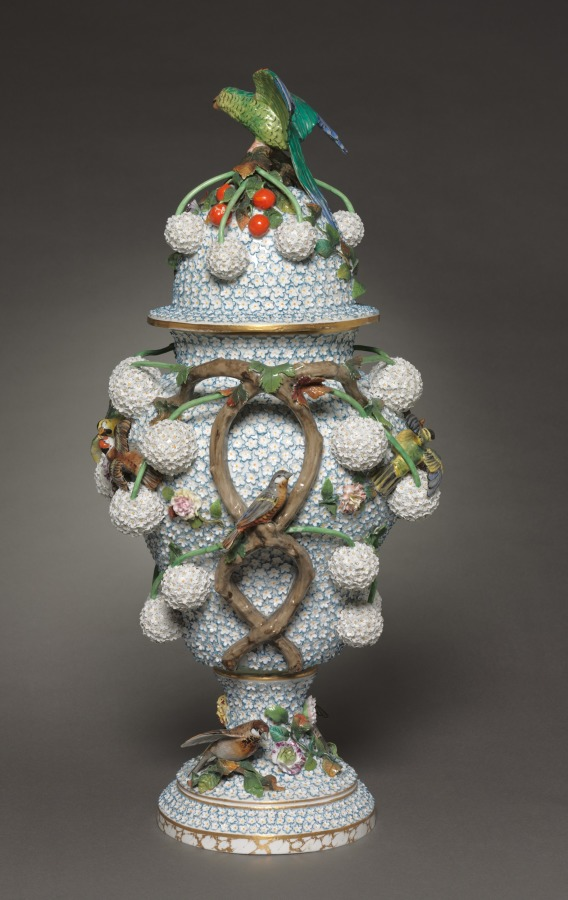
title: Vase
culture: Germany, 19th century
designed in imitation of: Meissen Porcelain Factory (German, est. c. 1710)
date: 1850–1899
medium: porcelain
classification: Ceramic